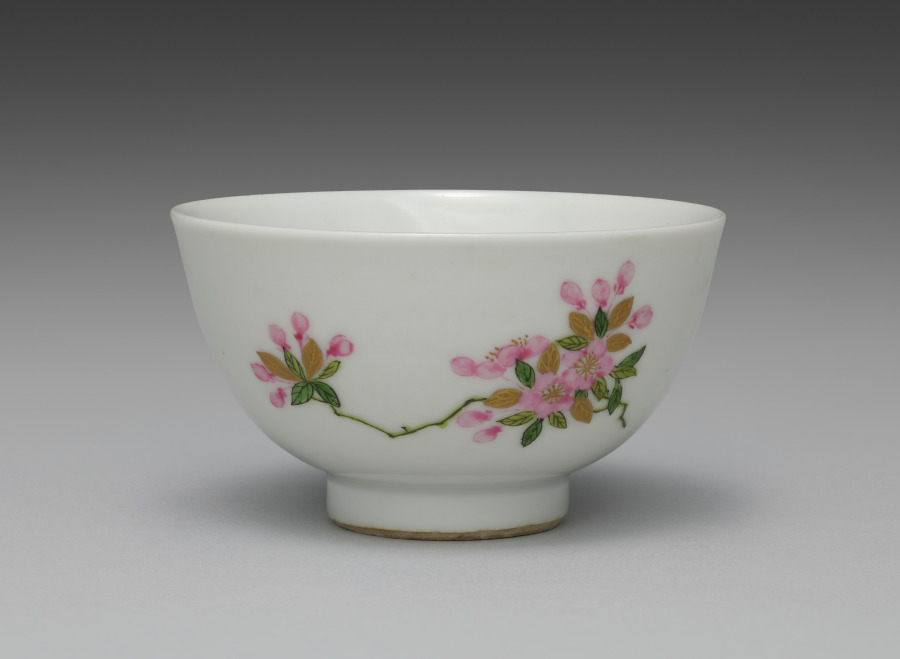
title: Teabowl from Teabowls with Peony and Crabapple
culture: Japan, Meiji period (1868–1912)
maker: Seifū Yohei III (Japanese, 1851–1914)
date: 1893–1914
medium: One from a set of five teabowls; porcelain with underglaze and overglaze color enamels and gold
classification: Ceramic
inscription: 清風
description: Overglaze color enamels are generally called iro-e (literally “color picture”) in the terminology customarily used for porcelain decoration of the Edo period. This set of teabowls is a fine example of Yohei III’s skilled use of the technique, which is identified on this set’s box lid with the alternate phrasing “porcelain with color painting” (jisaiga). Distinct from the way overglaze colors were used in Kakiemon ware from Arita, his designs and applications show a consciousness of porcelain decoration of the Qing dynasty. Here, he combines Chinese models with a sensibility taken from Kyoto ware precedents, including painting with powdered gold (kinrande). The colors used in the bowls are as follows: blue, black, gold, white, light green, green, and pink. The blue appears only inside the footring, as a double band of underglaze color. The black iron, used for stems and leaf veins, is painted over the glaze. The gold, also painted over the glaze, is used for leaves and the centers of flowers, for solid, glossy lines defining detail, or as a semimatte ground. Yohei has incised lines of varying widths into the pigment, carving away to the bowl’s surface, to differentiate individual petals and their rippled shapes. The light and dark greens, as well as the pink, are painted over the glaze. Of note is how Yohei has first used thinly applied lines of light green to draw the plum branch before applying the opaque iron black. For the plum buds and flowers, he has used a diluted pink with an opaque pink for outline, both over the glaze. In his later works, Yohei used pink both over and under the glaze in a manner similar to underglaze blue, and it can be challenging in some cases to discern which technique he has used. A lidded container in a private collection has a similar design but is augmented with the inclusion of white and purple magnolia blossoms. In contemplating the original decorative program of a set, of which these teabowls may have been a part, it is worth considering that perhaps not all objects included the full range of motifs. In such cases, the composition of the individual object may be best understood within the context of the extended ensemble. Here, the delicate pink plum on one side of the bowl seems slightly unbalanced with the bold white peony on the other, but when seen with other objects with the magnolia and its additional colors and shapes, it is possible to imagine a set with a complex, balanced design across multiple pieces.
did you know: The white of the peony flower is built up to a low relief over the glaze.